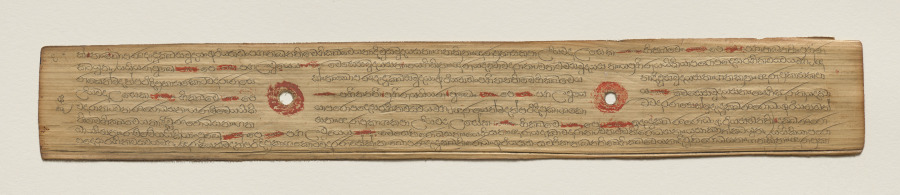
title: Leaf from a Buddhist Manuscript (recto)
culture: Sri Lanka, Singhalese, Late 17th century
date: c. 1700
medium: fiber paper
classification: Manuscript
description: Palm leaf material is still used for manuscripts in Sri Lanka. The palm leaves are prepared first by boiling them, drying them in the sun, and then rubbing them with oils. Scribes then use a metal stylus to incise the text. Then charcoal powder is wiped across the pages, filling in only the inscribed lines.